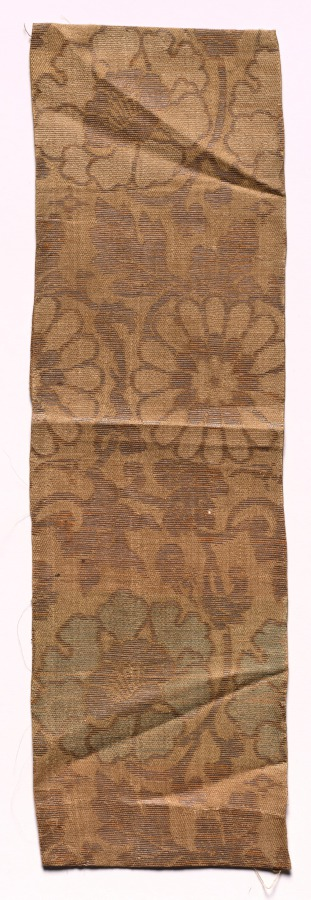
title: Textile Fragment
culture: Japan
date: 1800s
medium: silk, metallic thread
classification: Textile